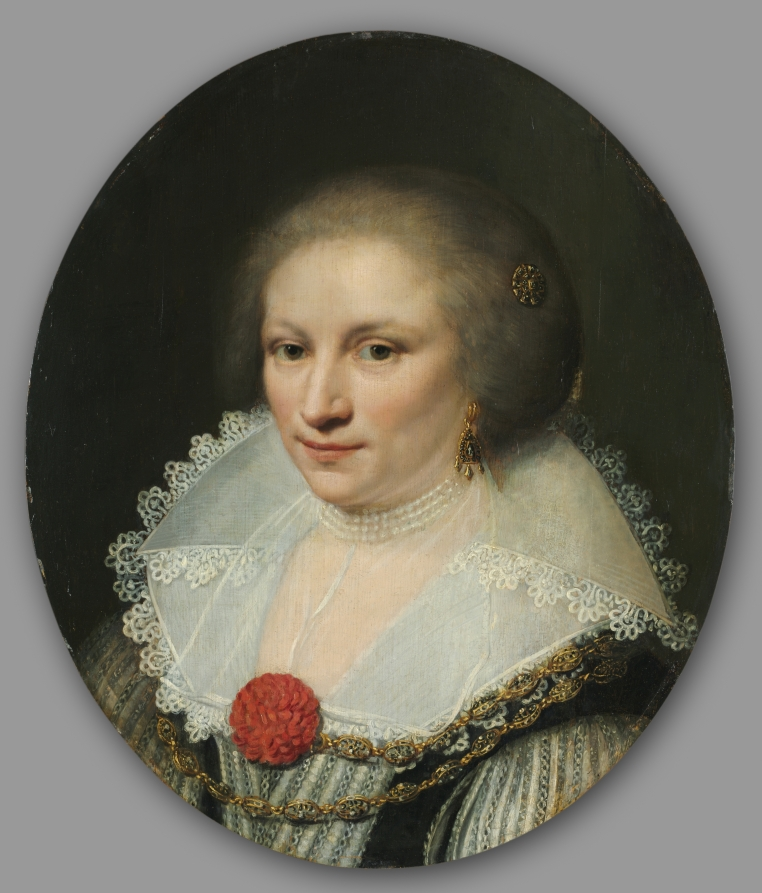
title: Portrait of a Woman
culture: Netherlands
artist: Jan Anthonisz. van Ravesteyn (Dutch, c. 1570–1657)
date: 1620s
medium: oil on wood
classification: Painting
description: How do you conserve a painting when portions are missing? The mid-treatment image (below) shows the painting after cleaning, when earlier restorations had been removed. In the painting on view, notice how the conservator reconstructed portions of the sitter’s lace collar and elaborate necklace. She re-created missing passages after studying the artist’s technique in other works and carefully emulating his treatment of the remaining lace and elements of the twisting, three-dimensional necklace. Conversely, there was not enough information to reconstruct what was probably another ornament at the back of the sitter’s head, so the decision was made not to speculate and invent something in that space.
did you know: The sitter wears several transparent and translucent white collars that become opaque when layered.